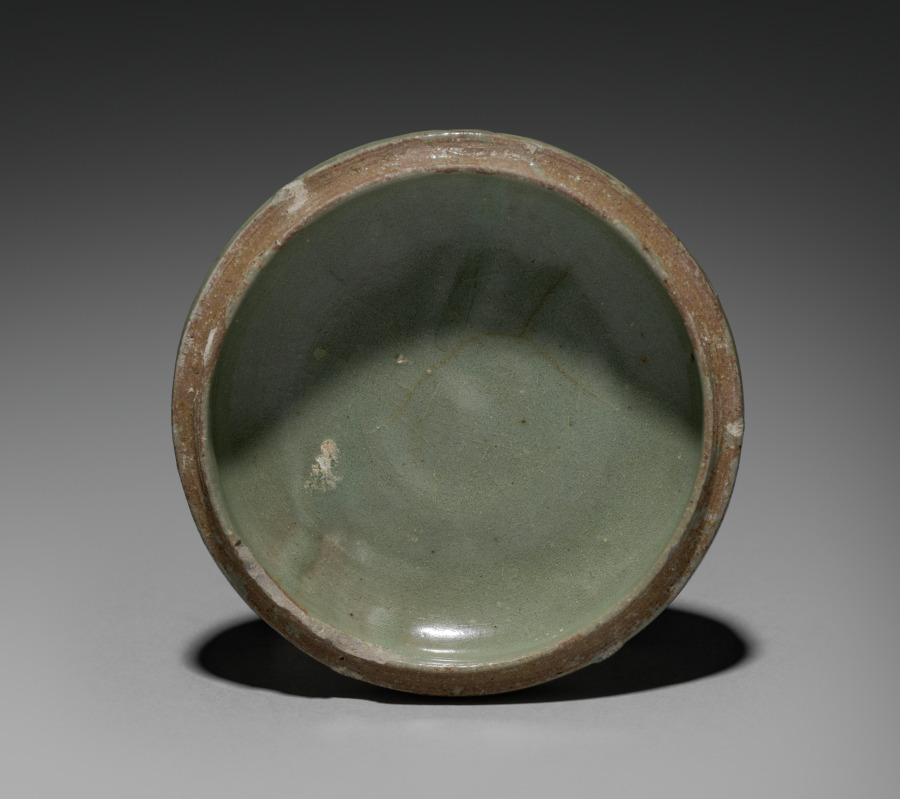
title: Pigment Box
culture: Korea, Goryeo dynasty (918–1392)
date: 918–1392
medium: inlaid celadon ware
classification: Ceramic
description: Celadons, spoons, seals, and bronze mirrors were the most common burial objects in tombs during the Goryeo period (918-1392). Once used to contain colored powder, rouge, and eyebrow gel for makeup, this small container was one of the standard goods that furnished elites' tombs. Both women and men used the grain powder of rice or millet for whitening their skin, safflower extract for rouge, and plant ash or soot for eyebrow gel. Yet, natural-looking make-up seems to have been the most favorable one in Korean according to the travelogue by Xu Jing (1091-1153), the Chinese diplomat who visited Korea in 1123.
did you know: This ceramic container was used to store either incense or cosmetics.